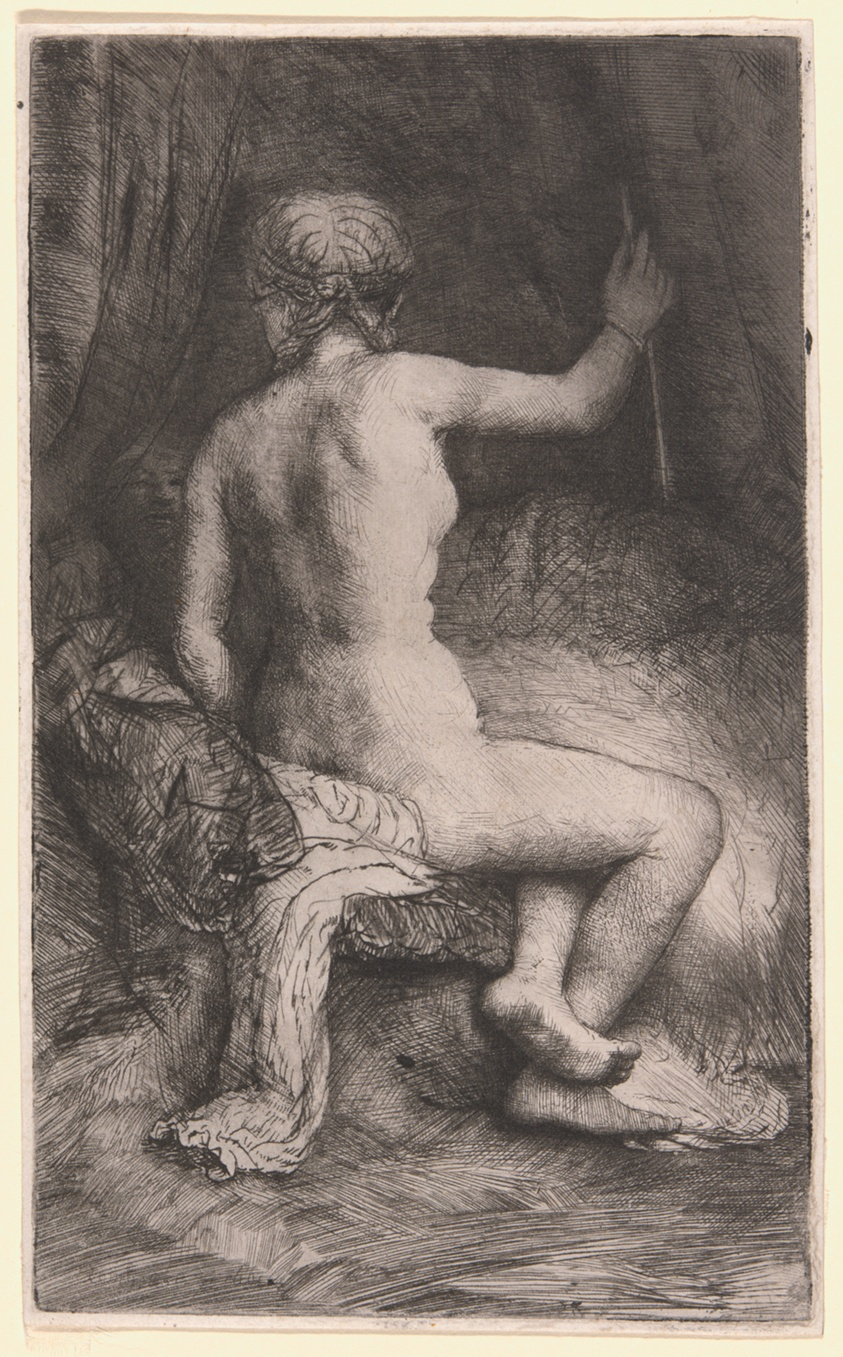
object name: Print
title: Woman with the Arrow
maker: Rembrandt van Rijn (Dutch, 1606-1669)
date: 1661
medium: Etching, drypoint and burin on ivory laid paper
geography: Holland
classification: etching; print; prints and drawing; paper; drypoint; burin